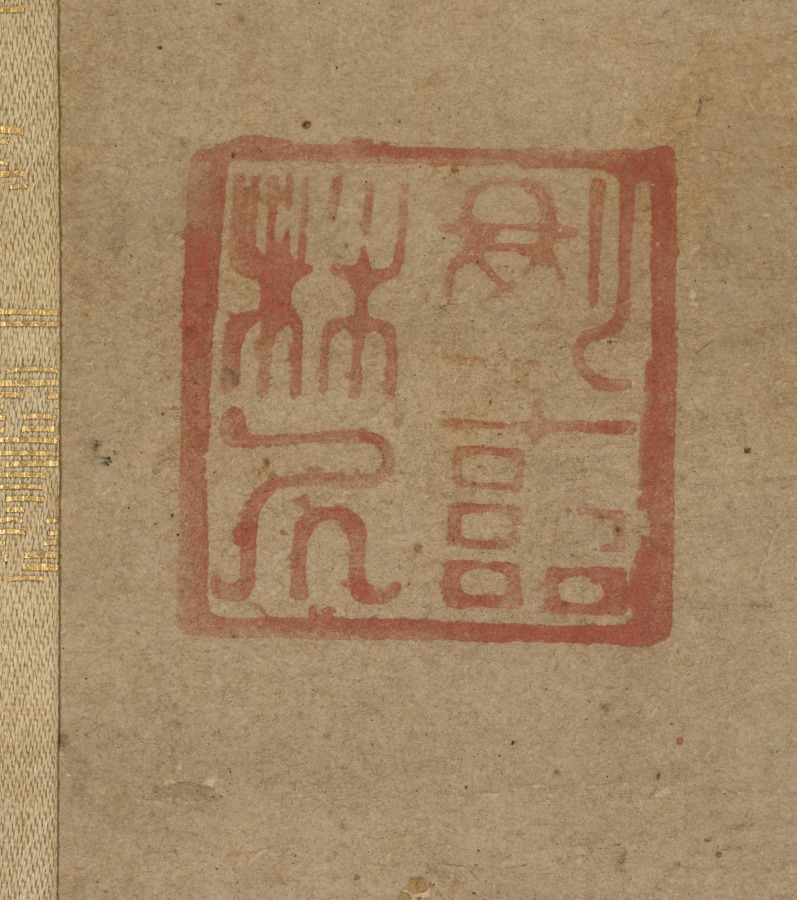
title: Fish and Rock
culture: Japan, Momoyama period (1573–1615)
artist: Rinkyo (Japanese)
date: 1573–1615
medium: one of a pair of hanging scrolls; ink on paper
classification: Painting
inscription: artist's seal at mid-left edge of painting.